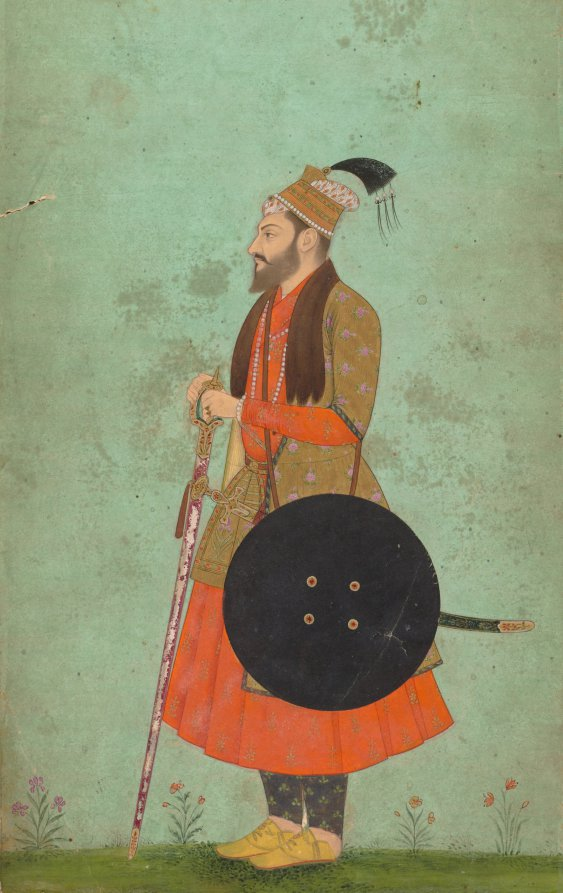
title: Portrait of Prince Murad Baksh (1624–1661)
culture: Mughal India, court of Shah Jahan (1627–58)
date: c. 1655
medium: Gum tempera and gold on paper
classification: Painting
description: This portrait depicts the Mughal prince Murad Baksh in his early 30s, at the height of his power and promise. He wears a golden coat of honor with fur collar and the swords and shield of a military officer. As the youngest son of Emperor Shah Jahan, he was intimately involved in the struggles for succession. In 1658, he sided with his brother Aurangzeb (1618–1707) against their eldest brother, the crown prince, whom they defeated in a decisive battle that led to the crown prince’s eventual assassination in 1659. Aurangzeb then turned on his youngest brother, Murad Baksh himself, and had him imprisoned and finally executed in 1661.